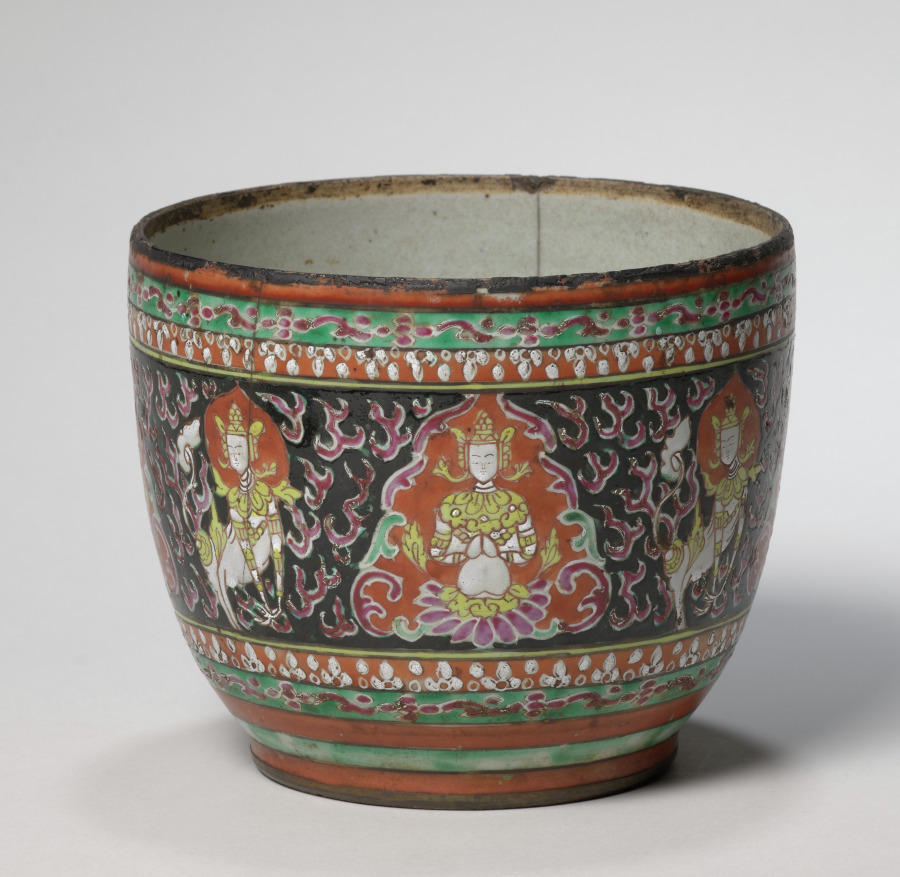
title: Jar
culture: Siam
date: 1800s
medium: porcelain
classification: Ceramic